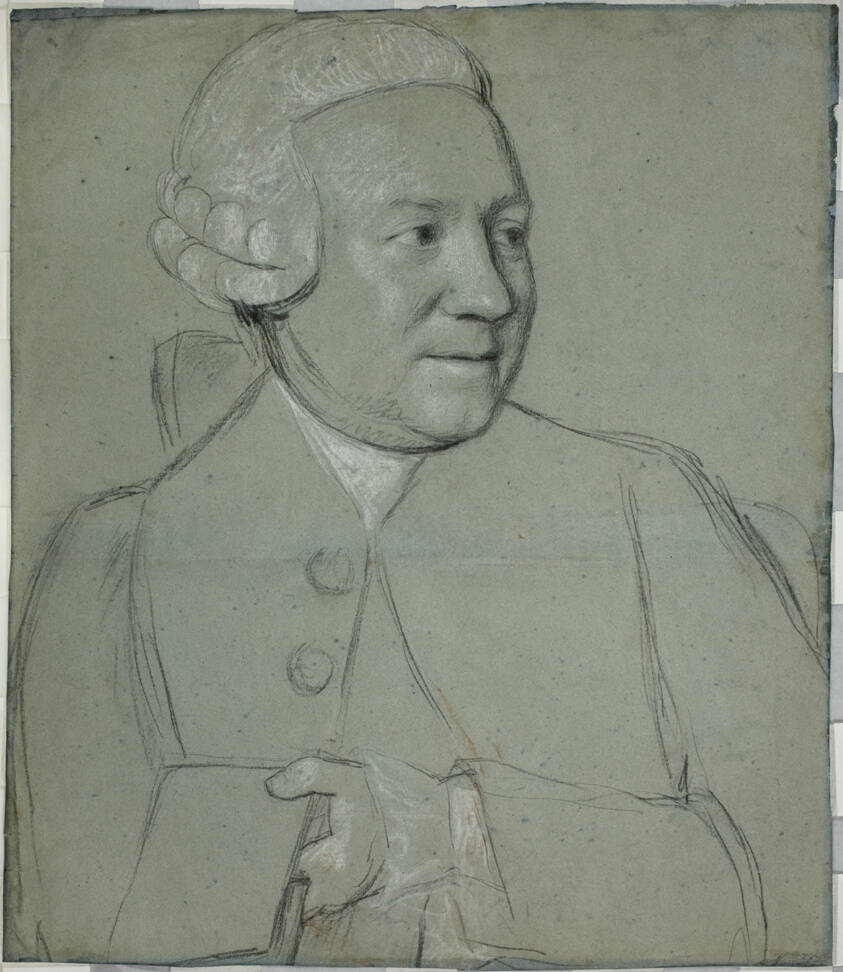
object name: Drawing and Watercolor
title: Portrait of a Man Holding a Book, Turned to the Right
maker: Jean-Étienne Liotard; Swiss, 1702-1789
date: 1758/62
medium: Black and white chalk, with traces of red chalk, on blue laid paper, rubbed on the verso with vermillion and traced with a stylus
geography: Switzerland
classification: drawings (visual works); prints and drawing